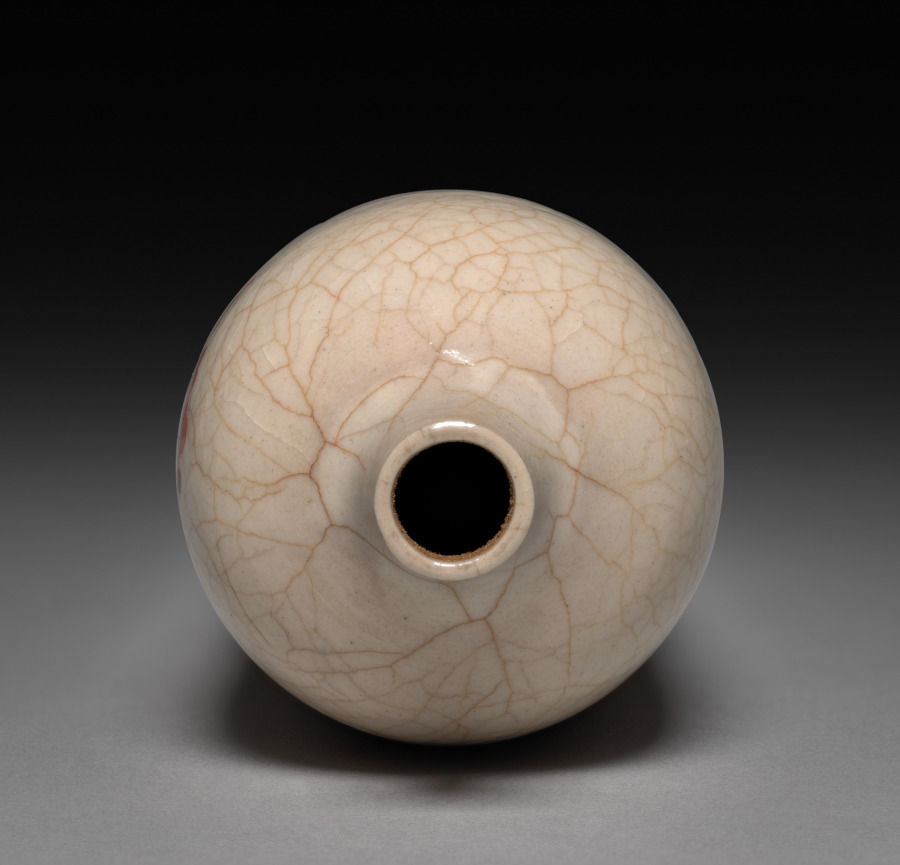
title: Snuff Bottle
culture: China, Qing dynasty (1644–1911), Qianlong reign (1736–95)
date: 1736–95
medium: porcelain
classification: Ceramic